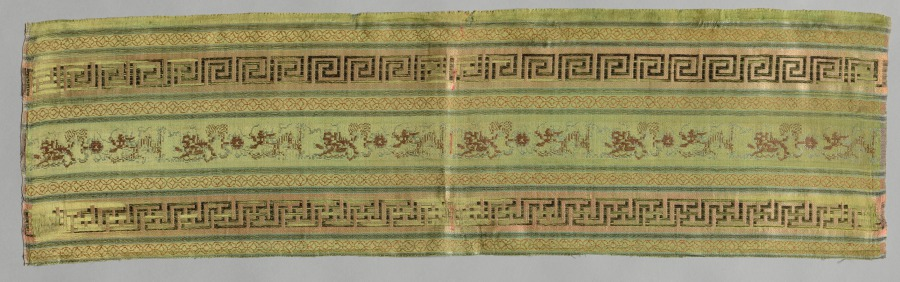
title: Fragment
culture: China, 19th century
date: 1800s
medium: silk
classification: Textile